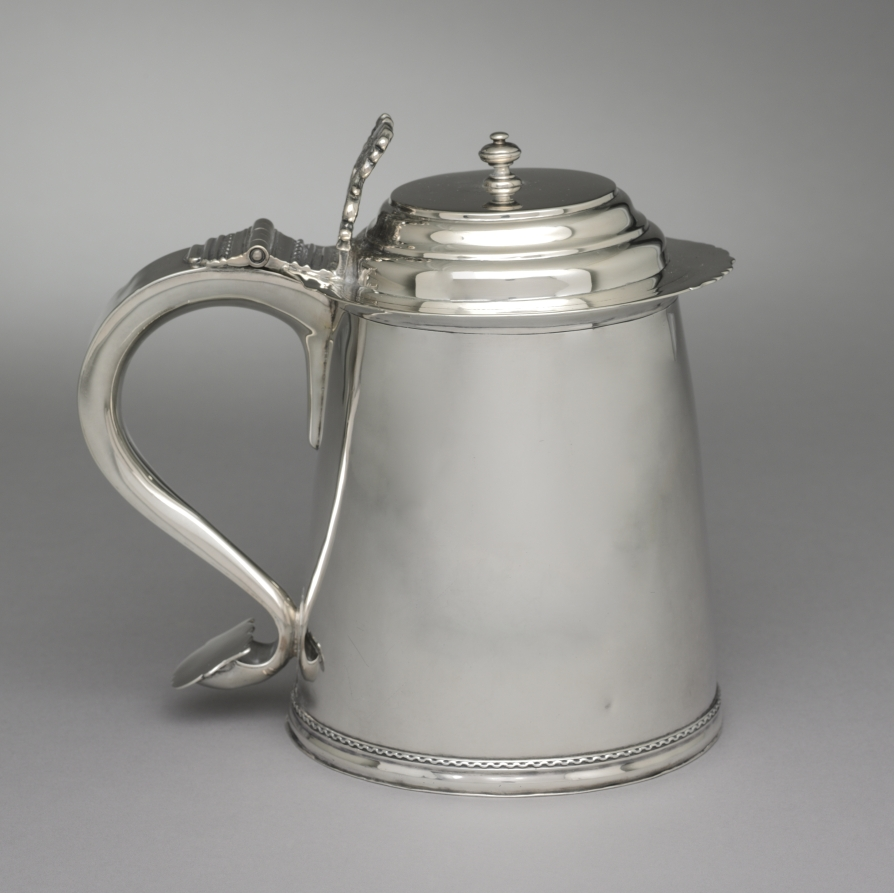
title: Tankard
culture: America, Newport, Rhode Island, 18th century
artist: Samuel Vernon (American, 1683–1737)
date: c. 1710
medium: silver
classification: Silver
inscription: engraved on top of handle: H over I*H